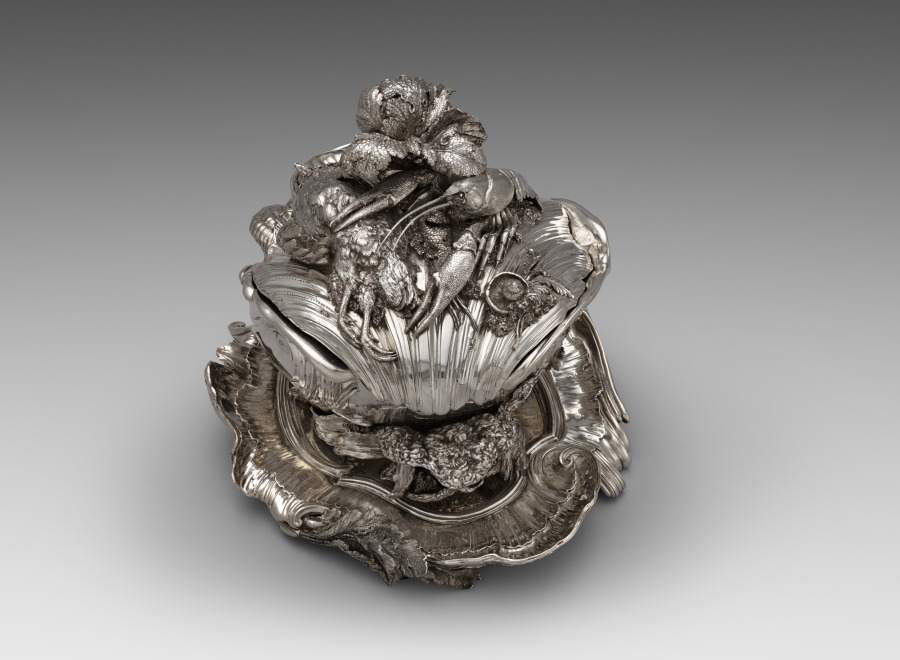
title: Covered Tureen on Stand (Pot-à-oille)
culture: France, Paris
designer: Juste-Aurèle Meissonnier (French, 1695–1750)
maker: Pierre-François Bonnestrenne (French)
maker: Henry Adnet (French, 1745)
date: 1735–38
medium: silver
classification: Silver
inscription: [Maker’s mark of Pierre−François Bonnestrenne, beneath platter; inside tureen (two marks)]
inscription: [Warden's mark for Paris, 1734−1735, beneath platter; inside tureen; inside cover]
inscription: [Charge mark of Hubert Louvet, Paris, 1732-1738, on platter border; beneath platter; beneath tureen; inside cover; inside tureen (two marks)]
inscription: [Discharge mark of Louis Robin mostly used for stamping small work, Paris 1738−1744, on platter border; beneath tureen]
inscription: [Warden's mark for Paris, 1736−1737, on platter border]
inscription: [Possibly British import mark, London, 1925, on platter border]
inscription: [Possibly mark of the British firm Charles & Richard Comyns, on platter border]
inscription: [Discharge of Louis Robin mostly used for stamping gold and silver between 1738 and 1744, beneath tureen; outside cover]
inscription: [Maker’s mark of Henry-Guillaume Adnet, inside cover]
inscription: [Two small undefined marks, inside cover]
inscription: [Under the surface of the platter the engraved signature]: “FAIT-PAR-I-A-MEISSONIER-ARCHITECTTE”; [and the weight] “673=5"; “No. [v] I 50 £ b76Sol”; [and the numbers] “A nº 1”; “A nº2”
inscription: [On tureen lip]: "MEISSONIER"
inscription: [On tureen lip]: “A nº 3”; “A nº2” [in order to place the tureen correctly on the stand]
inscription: [Numbers engraved on the stand, the tureen, and the cover to show how the piece should be assembled]: “A nº 1” [on the base of the tureen; beneath the cover; on the platter], “A nº 2” [on the platter], “A nº 3” [on the exterior rim of the tureen], “A nº4”; “A nº 5” [outside the cover], “A nº 7” [on the border of the platter]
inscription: [Two warden's marks for Paris, 1735-1736, beneath tureen]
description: This tureen exemplifies the French Rococo style, an artistic movement celebrating naturalistic forms that developed in Paris during the early 1700s. In contrast to classical, controlled symmetry, Rococo forms morph, twist, and spill into the space around them. Meissonnier embellished this tureen in a picturesque arrangement of vegetables and creatures, transforming a utilitarian object into a decadent display of wealth and abundance. This masterpiece comes from a set of two tureens commissioned by the English Duke of Kingston during an extended stay in Paris in the 1730s.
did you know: The langoustine, pigeon, and vegetables were cast using real examples giving the silver copies lifelike detail and appearance.